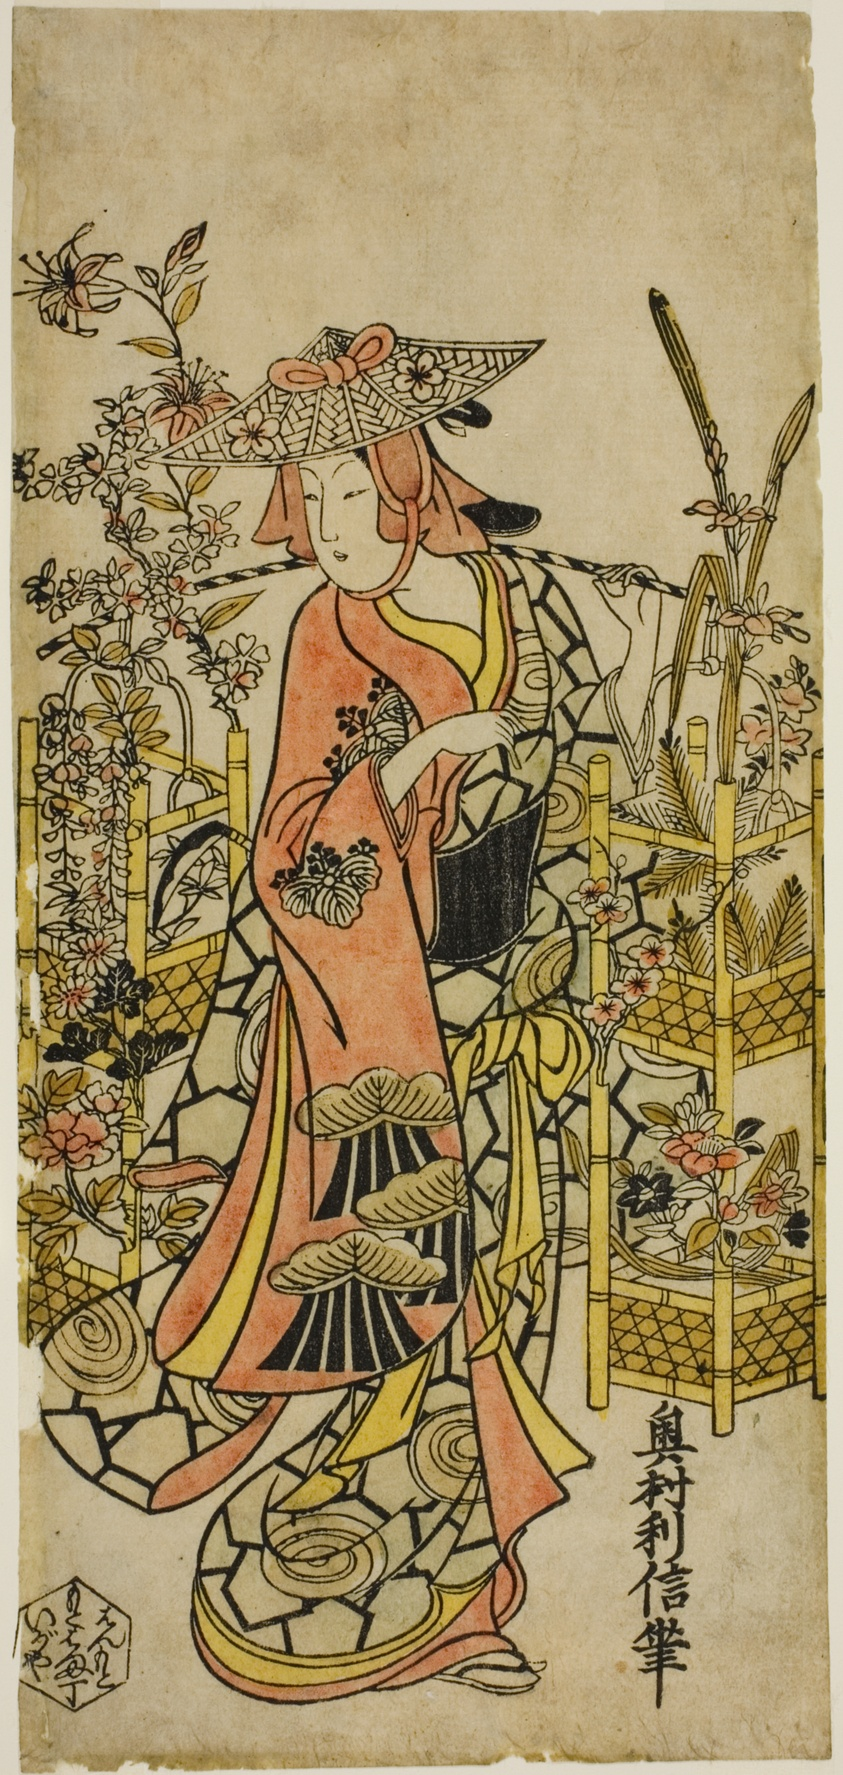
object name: Print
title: The Actor Hayakawa Hatsuse as a Flower Vendor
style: Japanese (culture or style)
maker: Okumura Toshinobu (Japanese, active c. 1717-50)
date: mid–1720s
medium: Hand-colored woodblock print; hosoban, urushi-e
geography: Japan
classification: woodblock print; print; asian art